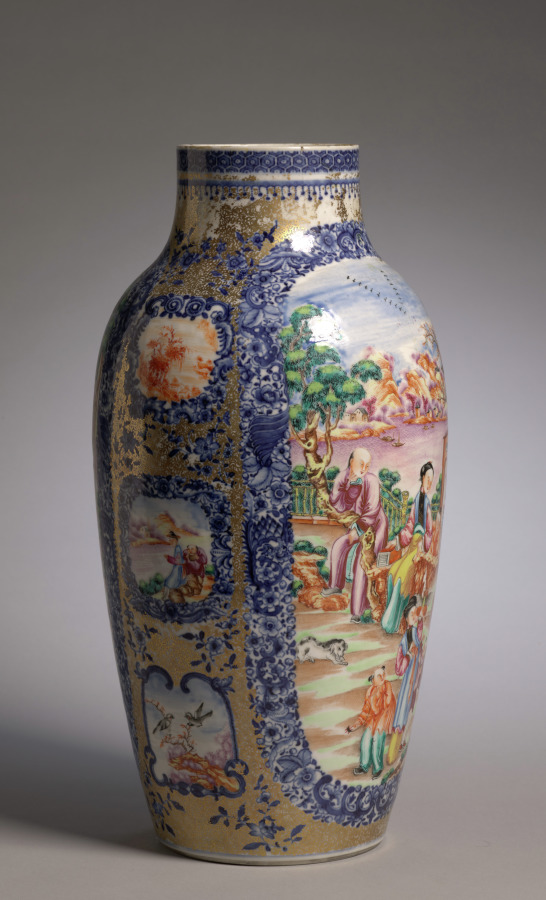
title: Vase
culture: China, Chinese Export, 18th century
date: c. 1770–80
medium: porcelain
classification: Ceramic